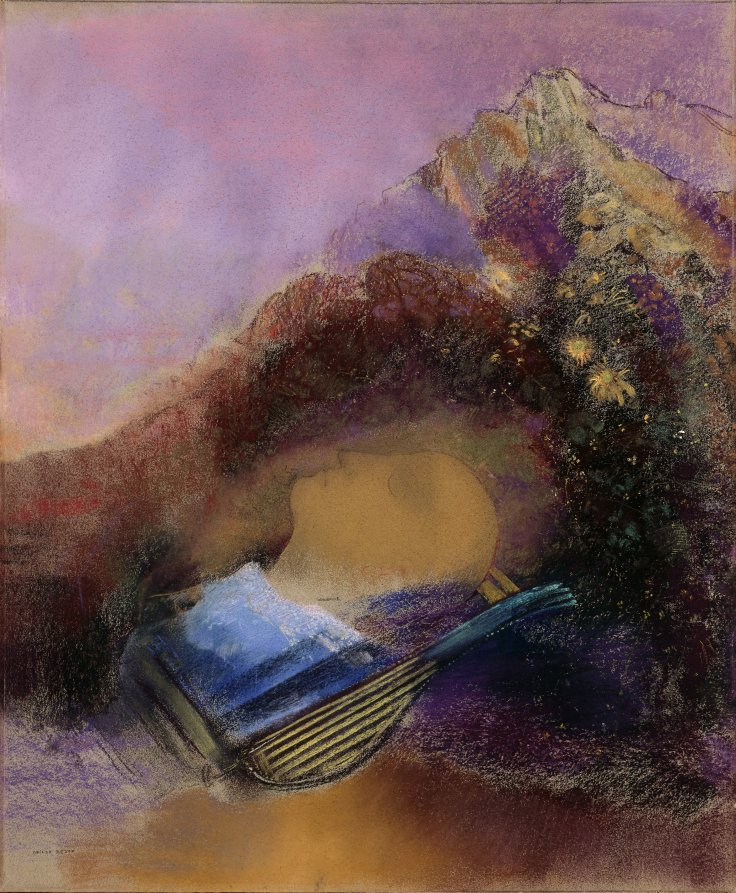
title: Orpheus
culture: France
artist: Odilon Redon (French, 1840–1916)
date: c. 1903–10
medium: pastel on brown paper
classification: Drawing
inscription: inscribed, lower left, in black pastel: ODILON REDON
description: Drawn in vivid layers of pastel crayon, this work depicts the head of the poet and musician Orpheus. The story of the god of music, whose music carried on after his death through his lyre and head, fascinated Redon, who related to Orpheus's dedication to his art. The subject also aligned with Redon's broader interest in dreams and spirituality around this time and he represented Orpheus several times throughout his career, in various media. Here, the god's head floats as if in stasis while Mount Parnassus—the home of Apollo and the Muses—soars from behind.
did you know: Another version of this pastel (now in the collection of the Musée Fabre de Montpellier) was part of a group of later works by Redon shown at the 1913 International Exhibition of Modern Art—better known as the Armory Show—which introduced the artist to American audiences.